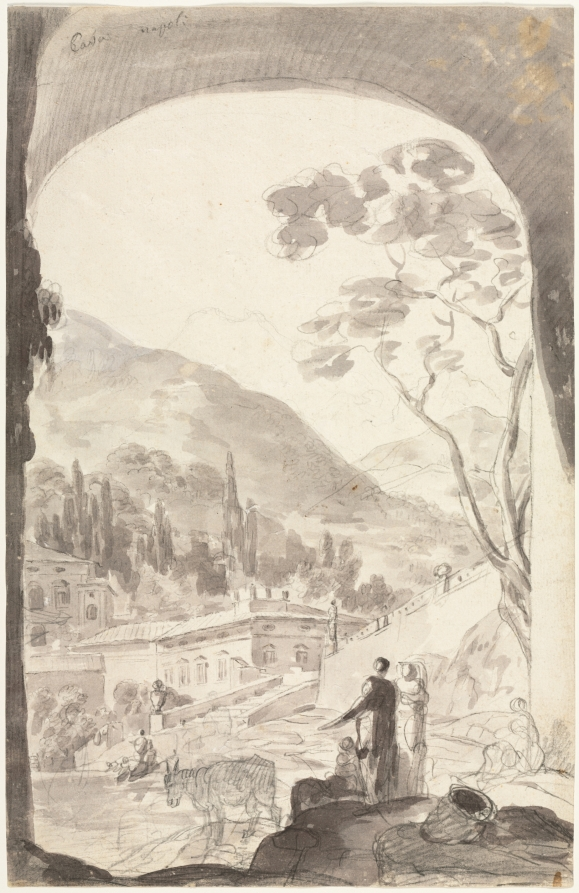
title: Cava Napoli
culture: France, 18th or 19th century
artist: attributed to Jean-Honoré Fragonard (French, 1732–1806)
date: 1700s or 1800s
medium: graphite, black chalk, brush and gray wash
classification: Drawing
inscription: [by artist?], upper left, in black chalk: Cava Napoli ; VERSO OF SECONDARY SUPPORT (now removed except for fragment containing inscription): Etude par Fragonard / (alors prix de Rome.) / Collection Chardey